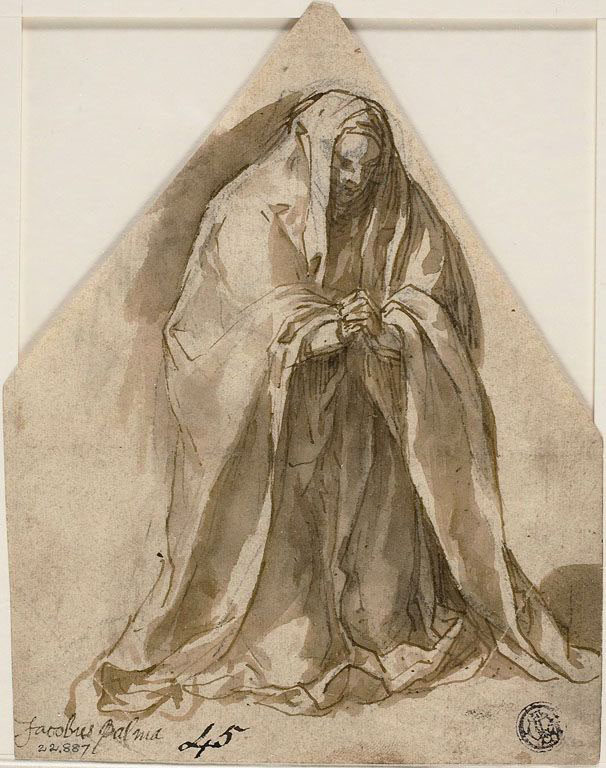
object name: Drawing and Watercolor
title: Kneeling Woman (recto and verso)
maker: Attributed to Sante Peranda; Italian, 1566-1638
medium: Pen and brown ink with brush and brown wash, over traces of black chalk (recto), and pen and brown ink with brush and brown wash (verso), on buff laid paper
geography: Italy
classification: ink with wash; drawings (visual works); prints and drawing